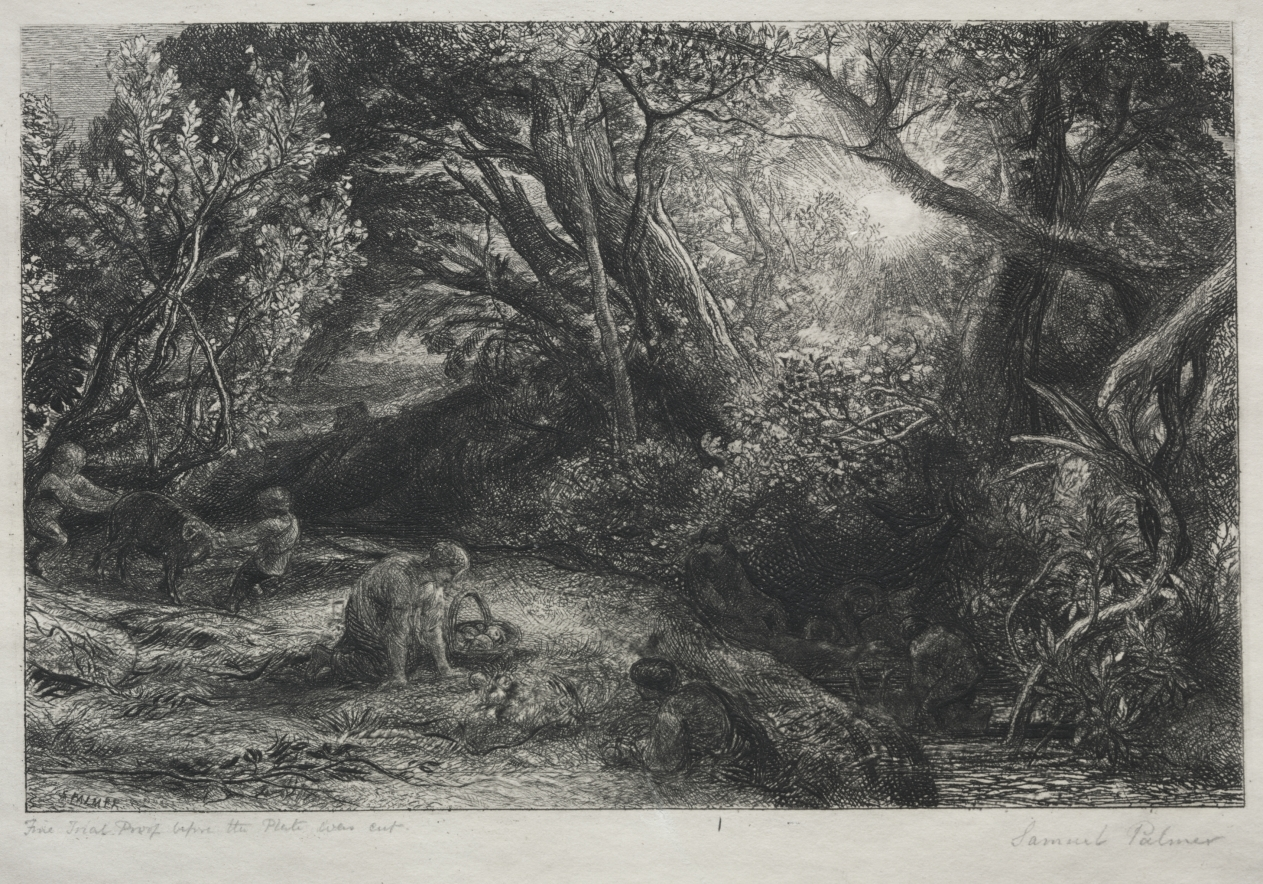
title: The Morning of Life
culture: England, 19th century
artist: Samuel Palmer (British, 1805–1881)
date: 1860–1861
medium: etching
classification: Print